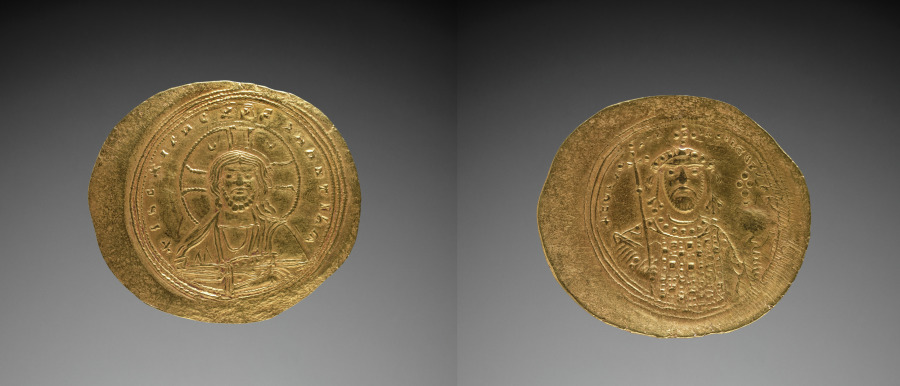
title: Nomisma with Constantine IX Monomachus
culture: Byzantium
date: 1042–1055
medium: gold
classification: Coins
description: The vast number of surviving Byzantine coins attests to the level of trade across the empire. Controlled and supervised by the emperor, the producers of coins took care to represent his authority and reflect his stature. Talented artists were recruited to engrave the dies (molds) used for the striking of coins. Emperors increasingly came to include their heirs and co-emperors on their coinage, as well as other family members or even earlier rulers. Coins were recognized, then as now, as small, portable works of art. With their inscriptions and images, Byzantine coins provide valuable documentation of historical events and a record of the physical appearance of the emperors. The solidus is the basic gold coin of 24 karats; the tremissis, a gold coin of one-third the weight and value of the solidus; and the nomisma, which in the 10th century replaced the solidus as the standard gold coin.